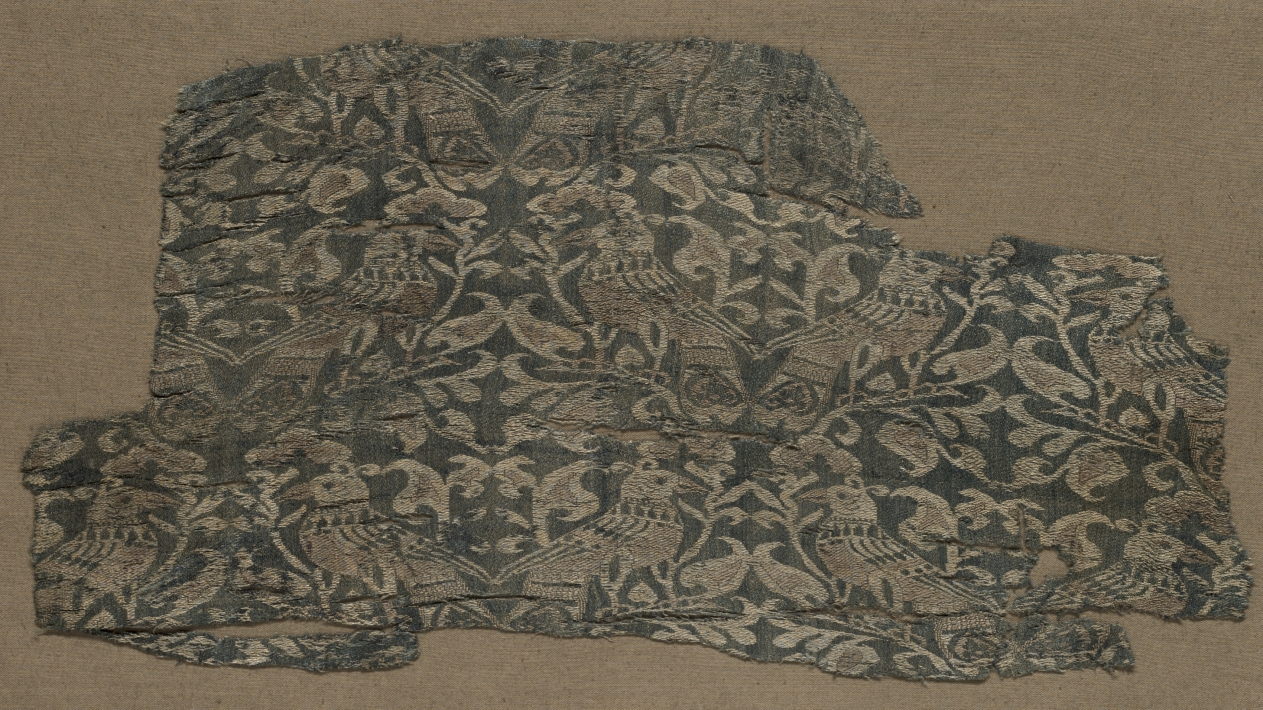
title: Fragment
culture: Iran, Rayy, late 12th or early 13th century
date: before 1948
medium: Silk: lampas weave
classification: Textile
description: On a blue ground is a pattern in white (now faded to cream) and red (now beige) of paired confronted birds repeated in staggered horizontal rows against scrolling foliation.